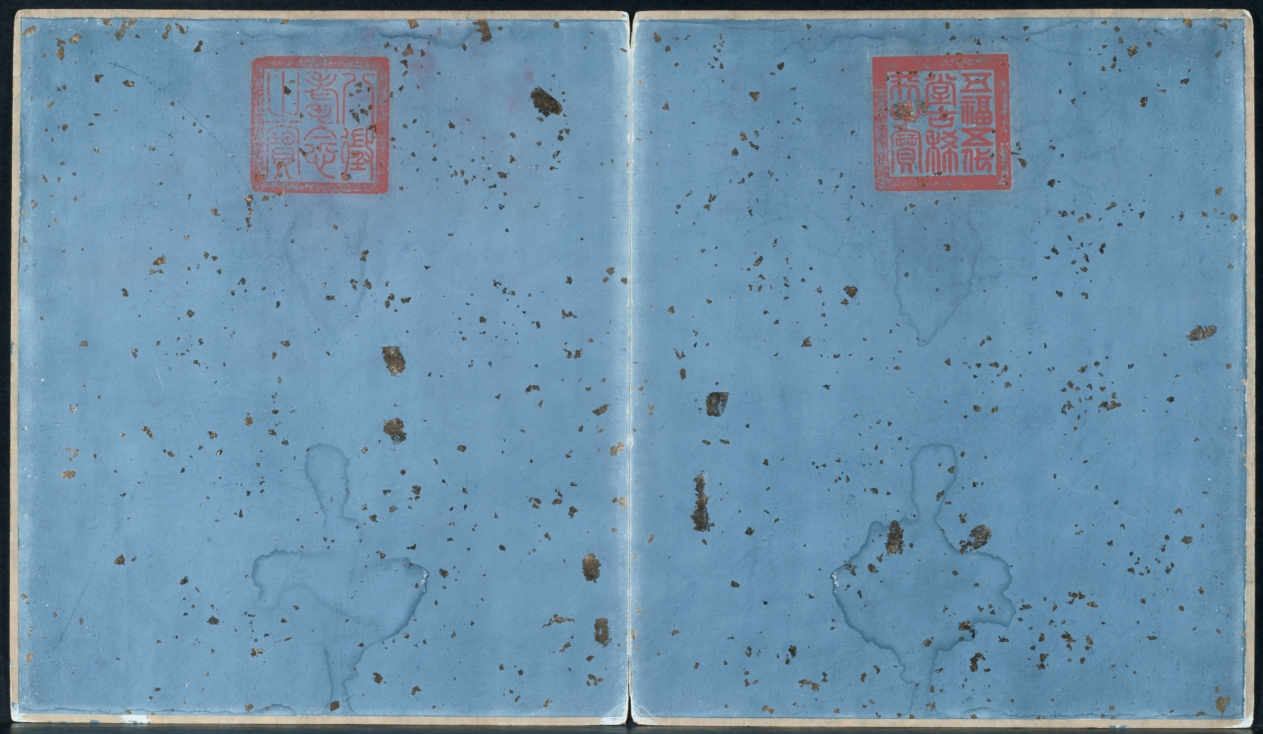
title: Battle Scenes of the Quelling of Rebellions in the Western Regions, with Imperial Poems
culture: China, Qing dynasty (1644–1911), Qianlong reign (1736–95)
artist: Giuseppe Castiglione (Italian, 1688–1766)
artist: Jean Damascene Sallusti (Italian, d. 1781)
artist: Jean Denis Attiret (French, 1702–1768)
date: c. 1765–74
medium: Etchings, mounted in album form, 16 leaves plus two additional leaves of inscriptions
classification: Print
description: This set of etchings was commissioned by Emperor Qianlong to record in pictorial terms the courage of his generals and soldiers in quelling the rebellions in the Western Regions. Qianlong added his own poem to each of the etchings, indicating his appreciation and pride in this demonstration of military might. "Western Regions" refers to the present-day Xingjiang province, often described in Western writing as "Central Asia."